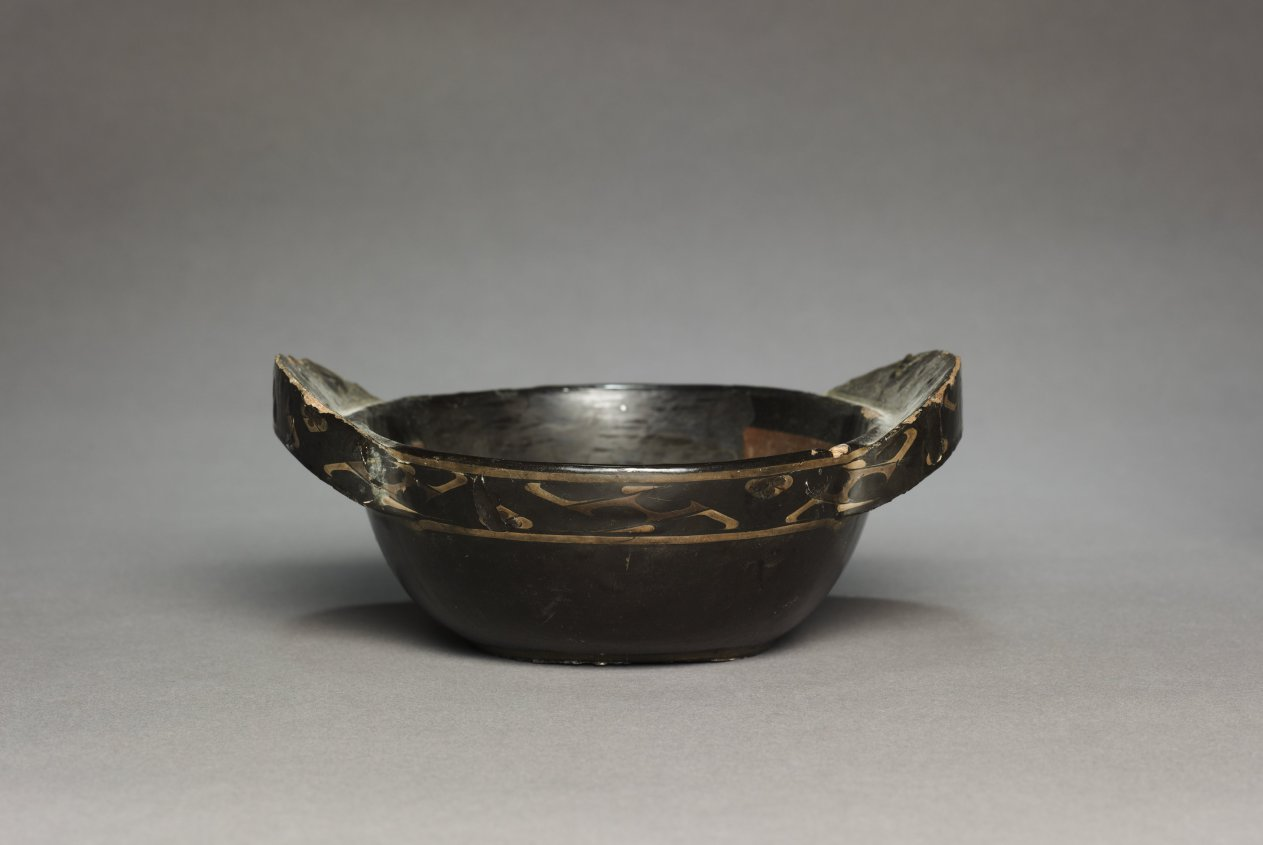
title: Winged Cup (Erbei)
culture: China, Western Han dynasty (206 BCE–8 CE)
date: c. 206–100 BCE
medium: lacquer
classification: Lacquer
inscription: inscribed: Taiguan